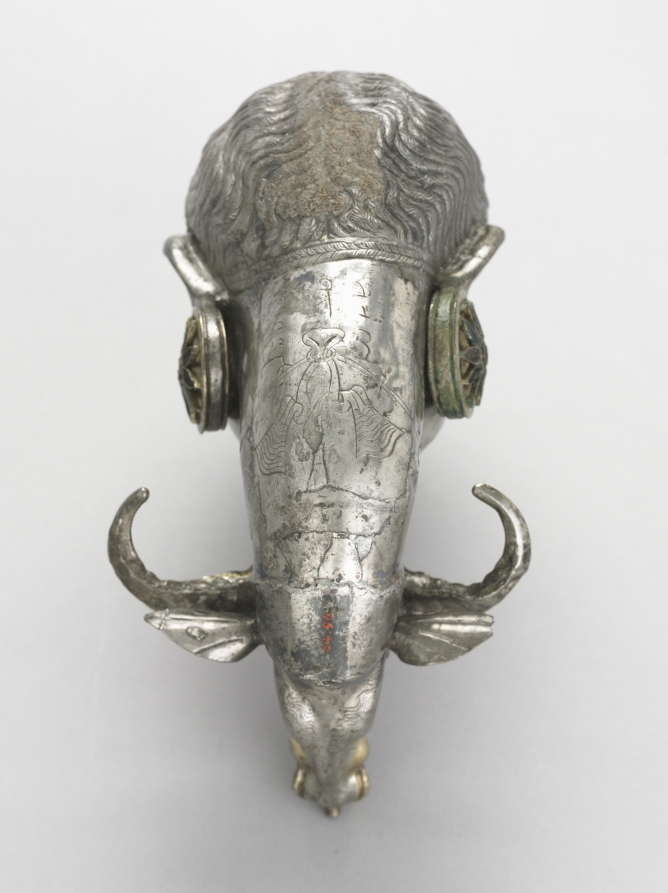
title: Woman and Water Buffalo Rhyton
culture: Sasanian, Iran, 600s or Turk Shahi dynasty, Kabul, Afghanistan, 500s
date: 500–700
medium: silver, with mercury gilding and glass inlays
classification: Metalwork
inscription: ?? 50 ZWZN 3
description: Recalling both Greek and Iranian traditions of head vases and rhyta (drinking horns), this unusual silver vessel combines the heads of a woman and a water buffalo. A filling hole on top and a pouring or drinking spout in front make clear its function. An inscription in Middle Persian on its back records its weight: probably 50 staters and three drachmae (close to its current weight of just over 700 grams, or about 1-1/2 pounds). The woman’s flat brow, straight nose, and widely set, heavy-lidded eyes—along with the sectarian mark in gold on her forehead—relate to art of the Indus River Valley and Hindu Kush regions of today’s Pakistan and Afghanistan. While we do not know for sure, numerous scholars have suggested that she may depict the Indian warrior goddess Durga, slayer of the buffalo demon.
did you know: Inlays once filled the buffalo eye sockets, perhaps of colored glass like that still present within some petals of the disc-shaped earrings.